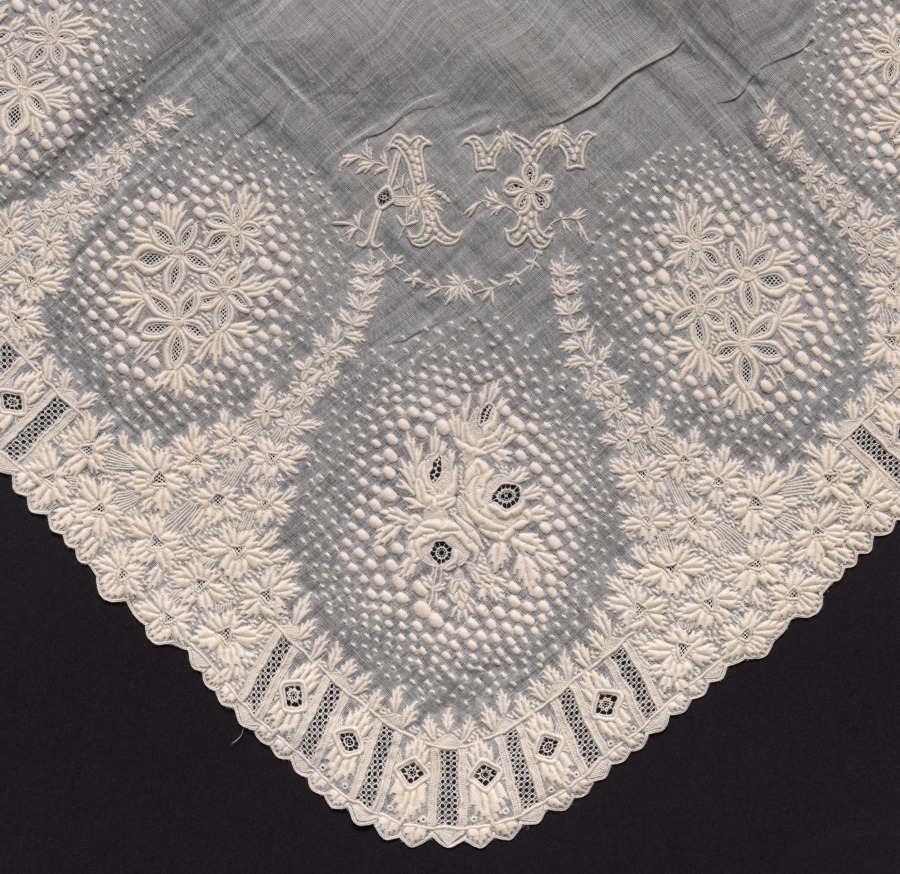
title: Handkerchief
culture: France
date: 1800–1820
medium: Plain weave linen center: white linen embroidery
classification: Embroidery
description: The initials A. T. are embroidered in one corner of this handkerchief.